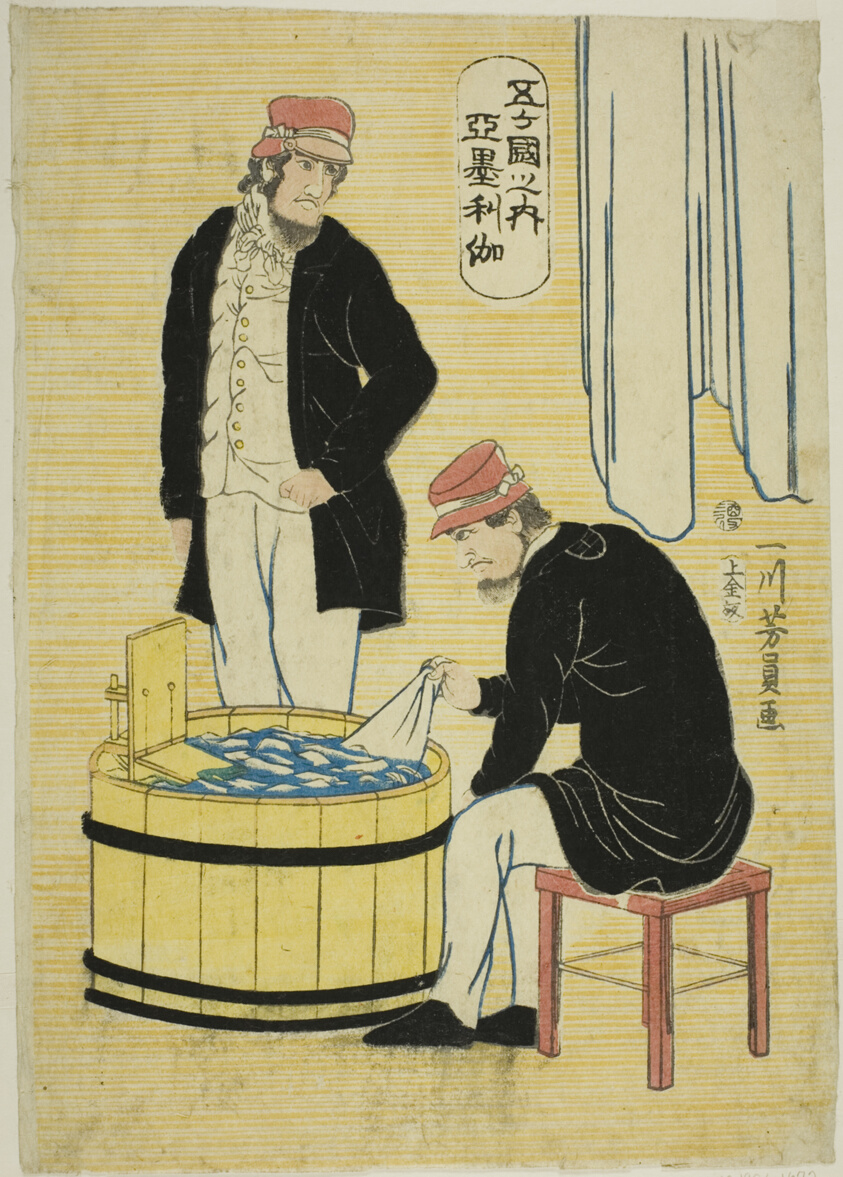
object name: Print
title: Among the Five Nations: Americans (Gokakoku no uchi, Amerikajin)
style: Japanese (culture or style)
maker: Utagawa Yoshikazu (Japanese, active c. 1850–70)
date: 1861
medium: Color woodblock print; oban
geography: Japan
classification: woodblock print; print; asian art